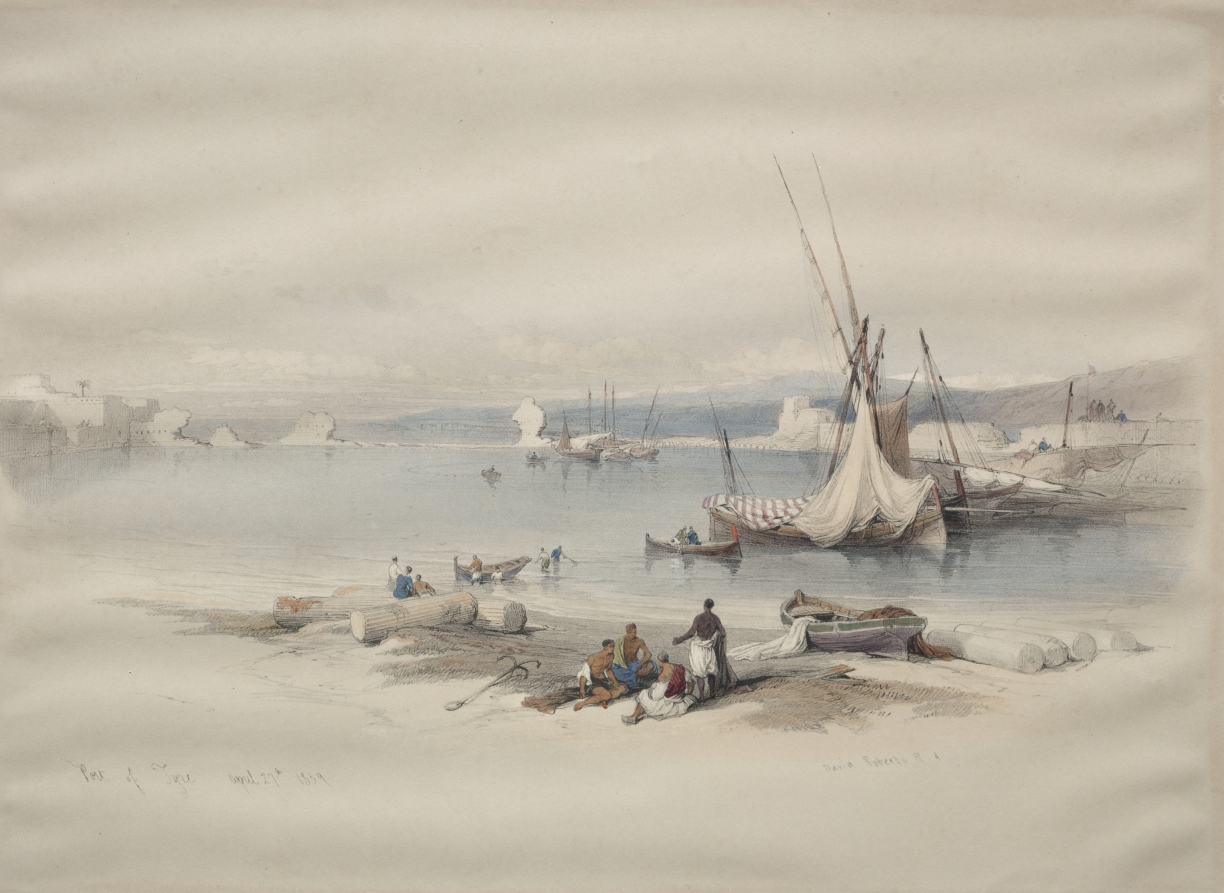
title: Port of Tyre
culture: England, 19th century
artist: David Roberts (Scottish, 1796–1864)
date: 1839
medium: color lithograph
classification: Print